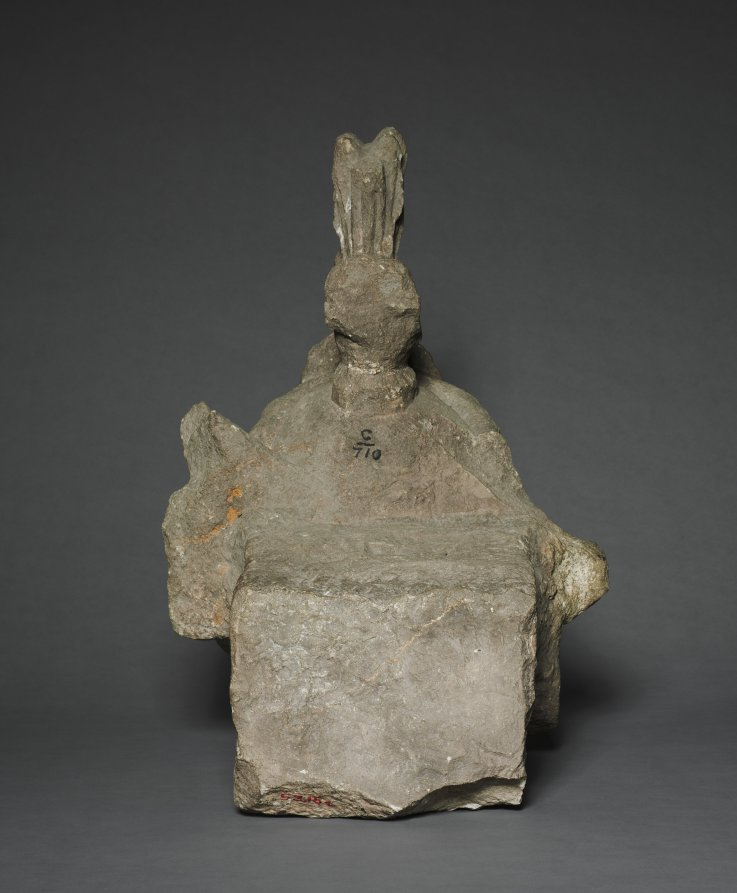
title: Head of a Young Noble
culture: Honduras, Copán, Structure 10L-22A, Maya style (250-900)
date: 746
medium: stone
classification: Sculpture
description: This young noble may be a political official of 8th-century Copán, an important site in eastern Maya territory. The noble, who embodies the Maya ideal of masculine beauty, wears circular ear ornaments and a headband, above which the tied hair rises. The meaning of the disembodied hand that cups the chin is debated. The head, collected by Harvard archaeologists in the 1890s, comes from the facade of a building may have been used as a council house by a Copán ruler and his advisors during a crisis that rocked the city’s ruling dynasty. On the structure’s upper level, above woven mat signs that symbolized political authority, eight figures were enthroned in T-shaped recesses. This head is from one of these figures. Beneath each recess was a hieroglyph thought to name an important town (or family) within Copán’s domain. The figures may represent these towns’ advisors to the king, whose image crowned the structure.